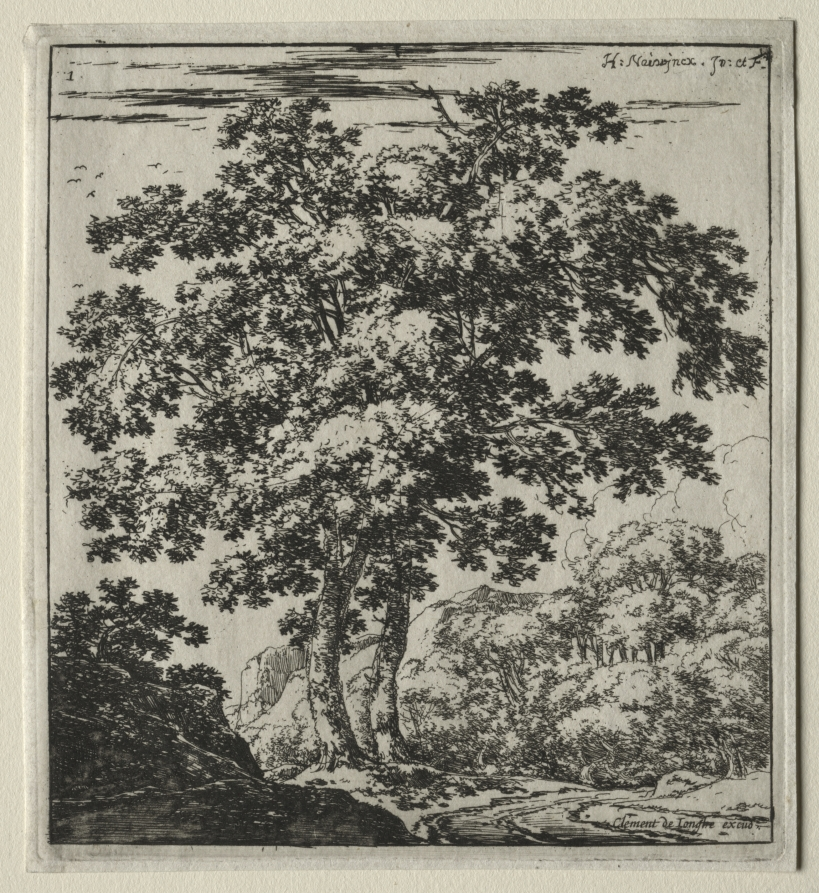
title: Les deux grands arbres au bord du chemin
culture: Flanders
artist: Herman Naiwincx (Flemish, c. 1624–after 1651)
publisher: Clement de Jonghe (Dutch, 1579–1679)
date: 1640–51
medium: engraving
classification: Print